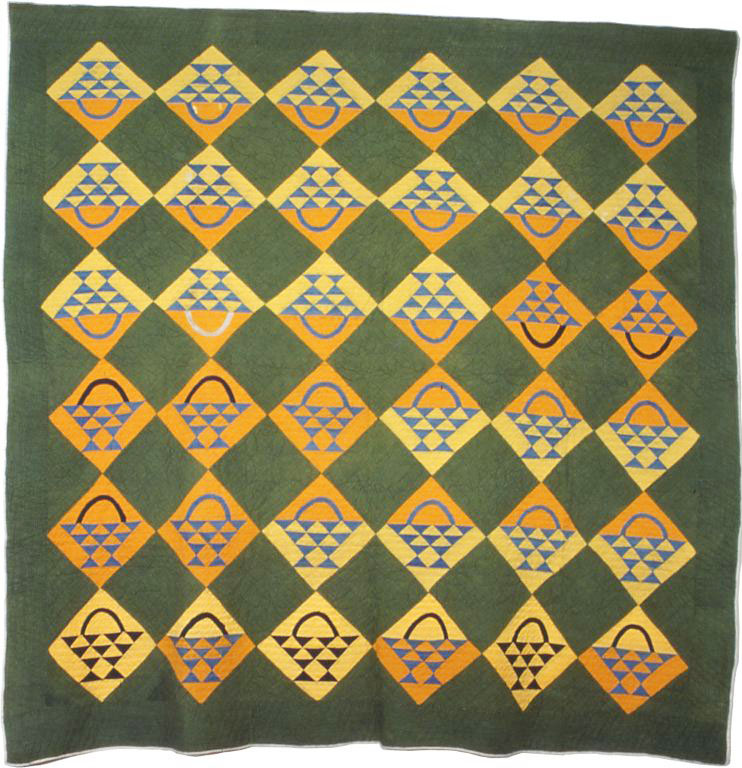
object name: Textile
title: Bedcover (Basket Pattern Quilt)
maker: Mary Katharine Ashbrook Hill (American, 1843–1927); United States, Southern Illinois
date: 1861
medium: Cotton, plain weave, pieced with cotton, plain weave, printed in small scale design, quilted, batting, backed with cotton, plain weave, basket pattern; handles appliqued with machine stitching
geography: Southern Illinois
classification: textile; needlework (visual works); needlework - quilt